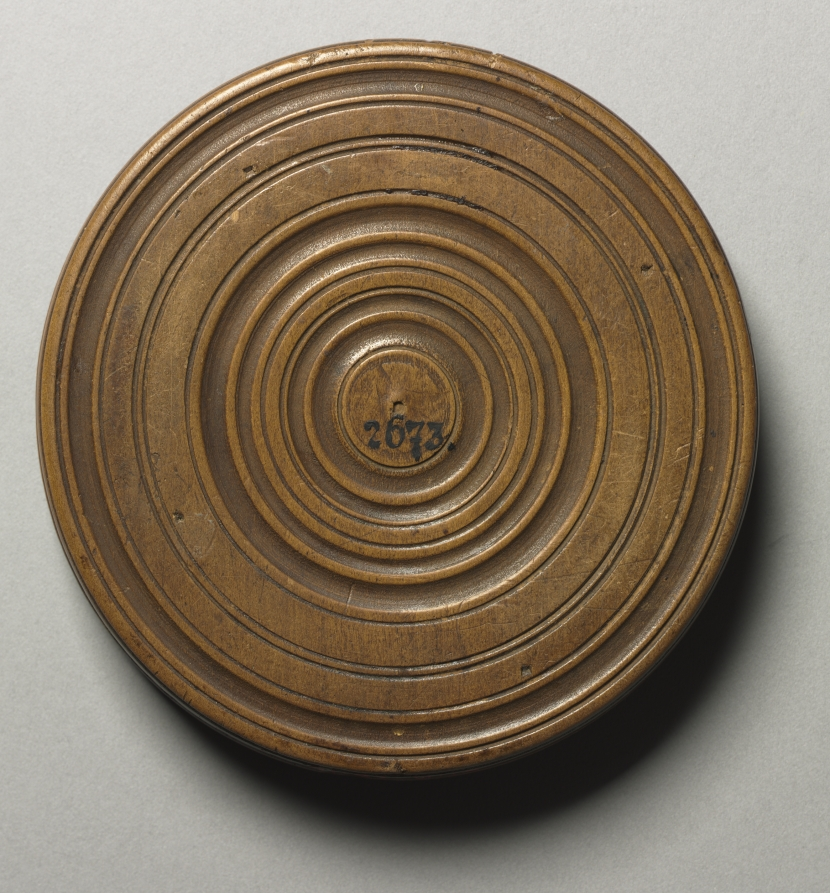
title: Model for a Portrait Medal of Wolfgang Gamensfelder at Age 19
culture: Germany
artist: Master of Gamensfelder (German)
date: 1531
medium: boxwood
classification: Sculpture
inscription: inscription at perimeter: SCULPTELE WOLFGANG GAMENSFELDER FACTU AETA SUE XIX ANNO AD XXXI.